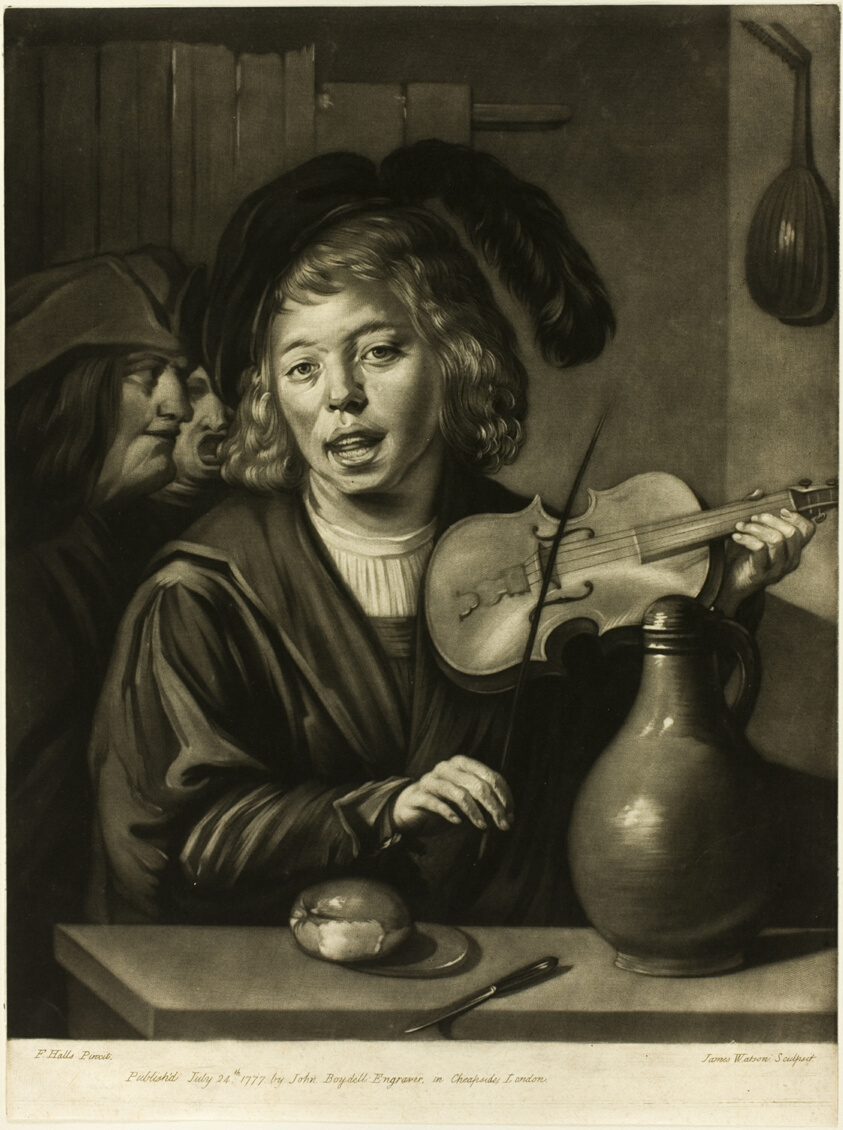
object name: Print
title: The Musical Boy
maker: James Watson (Irish, c. 1740-1790); after Frans Hals (Dutch, 1582/83-1666)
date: 1777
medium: Mezzotint in black on cream laid paper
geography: England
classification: mezzotint; print; prints and drawing